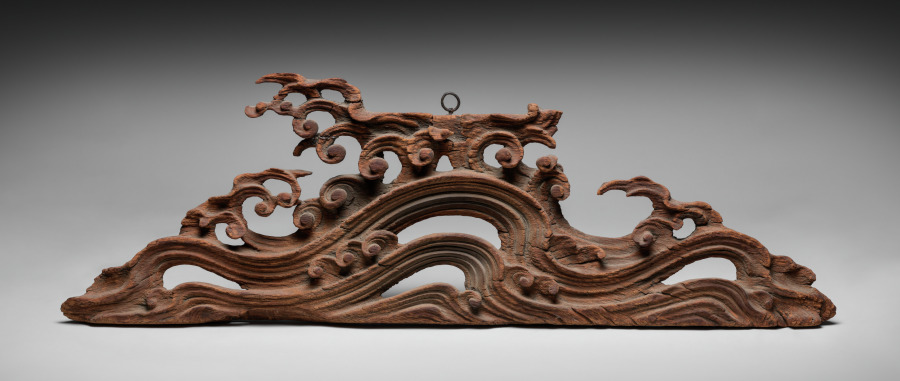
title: Wave (ramma)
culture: Japan, Momoyama period (1573–1615)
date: c. 1600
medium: wood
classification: Sculpture